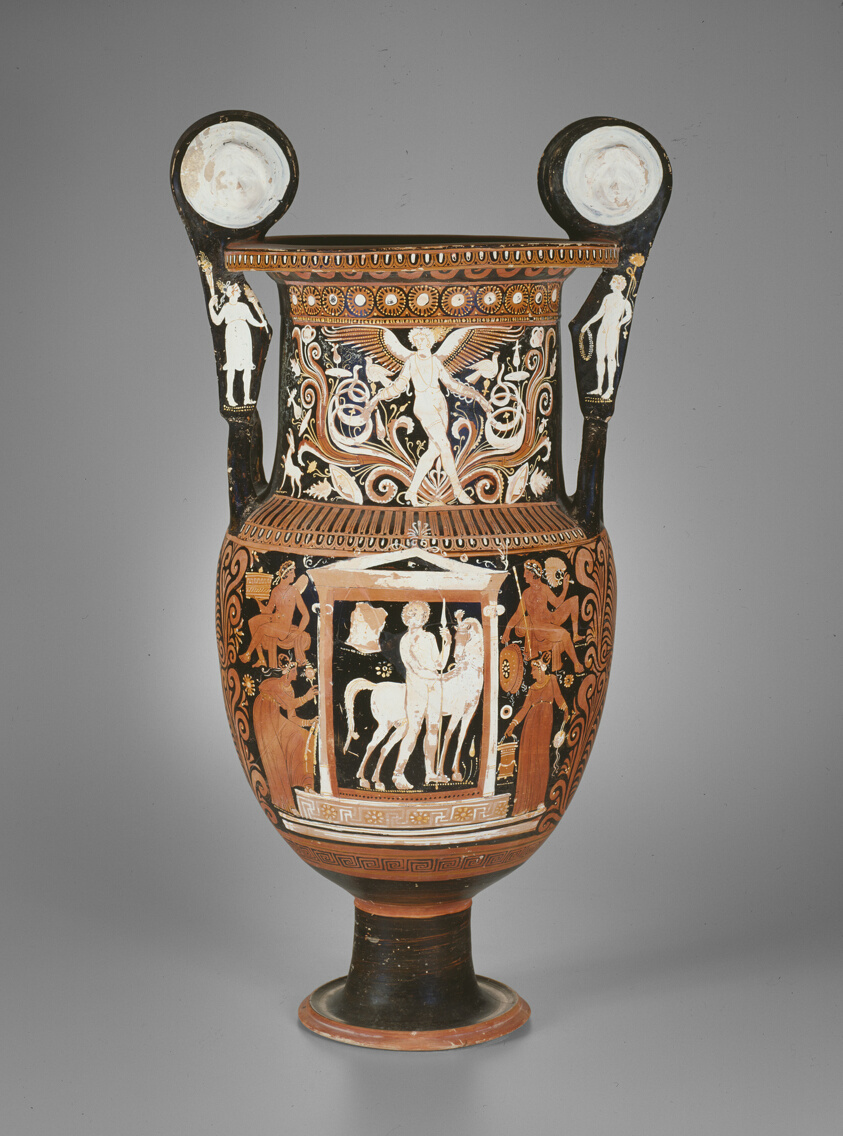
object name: Funerary Object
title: Volute Krater (Mixing Bowl)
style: red-figure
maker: Attributed to the White Saccos Group; Greek; Apulia, Italy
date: 330-320 BCE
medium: terracotta, red-figure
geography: Apulia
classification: vessel; earthenware; ceramics; ancient art